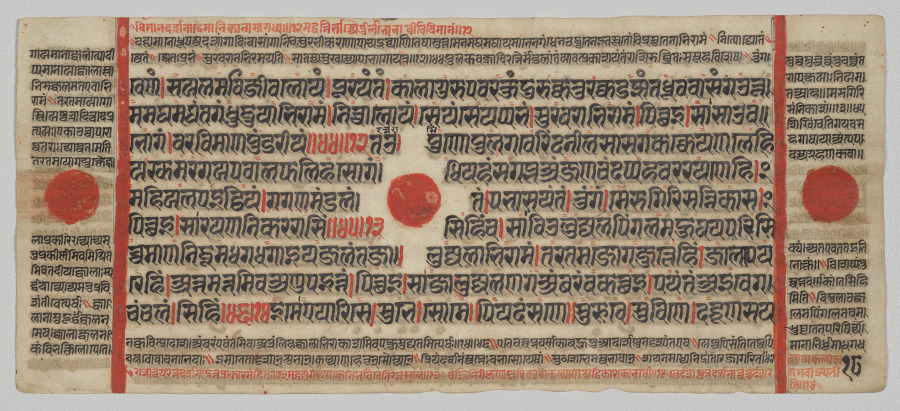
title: Text, Folio 18 (verso), from a Kalpa-sutra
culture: Western India, Gujarat, last quarter of the 15th century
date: c. 1475–1500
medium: Gum tempera, ink, and gold on paper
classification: Painting